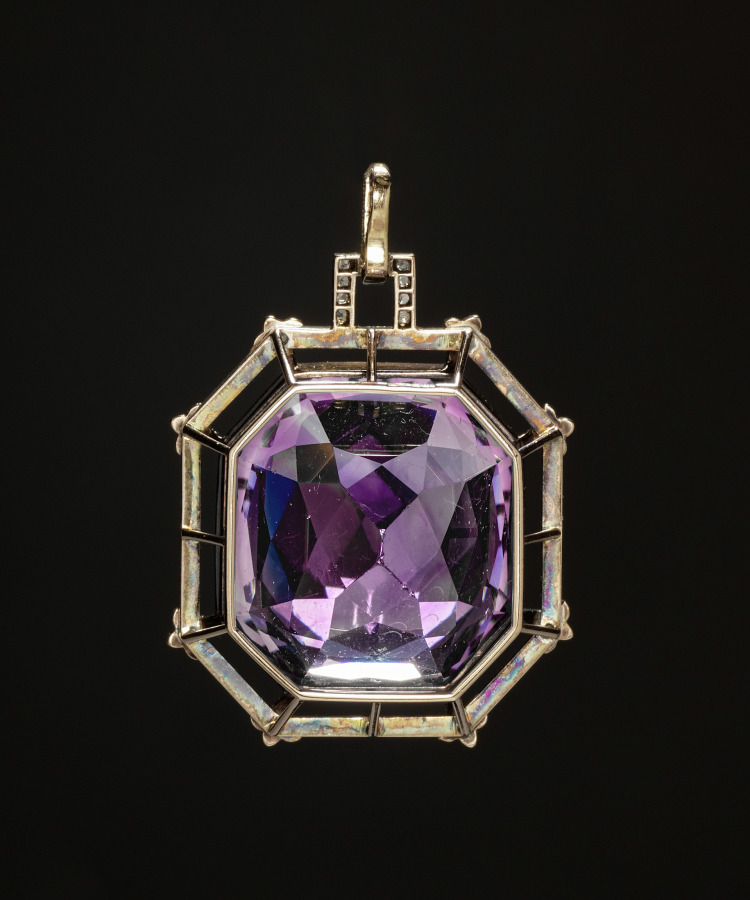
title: Pendant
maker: House of Fabergé (Russian, 1842–1918)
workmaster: Albert Holmström (Finnish, 1876–1925)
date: c. 1910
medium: amethyst, guilloché enamel, diamonds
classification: Jewelry